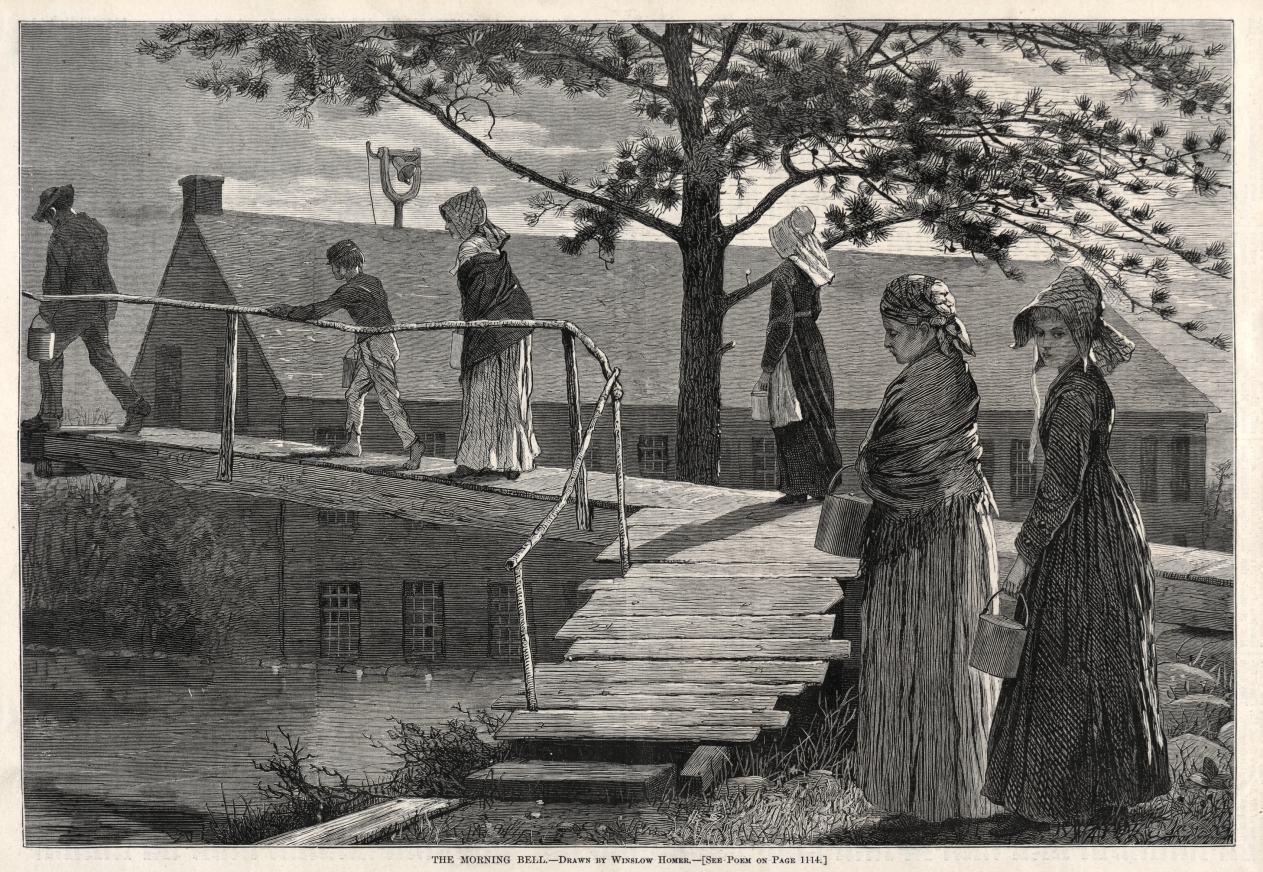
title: The Morning Bell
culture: America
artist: Winslow Homer (American, 1836–1910)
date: 1873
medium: wood engraving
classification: Print